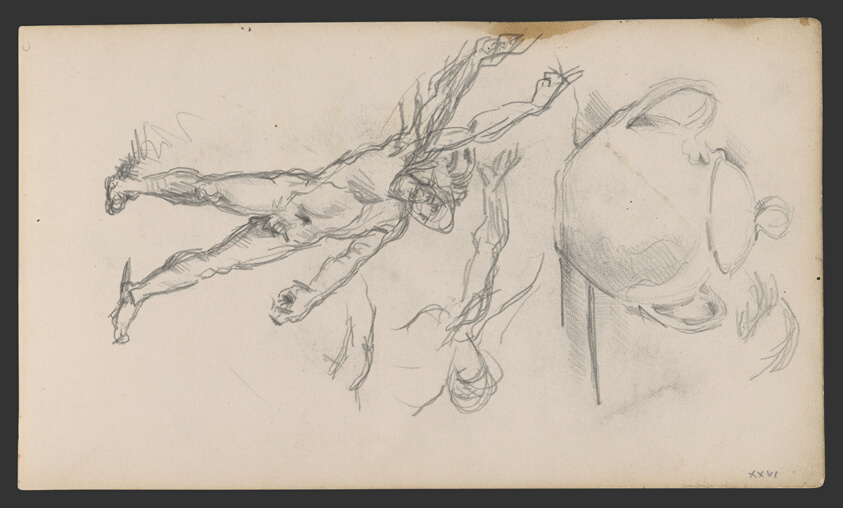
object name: Drawing and Watercolor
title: Sketchbook No. 2 (L'Estaque)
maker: Paul Cézanne; French, 1839-1906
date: 1875–86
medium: Graphite and pen and ink drawings on paper, bound into a book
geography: France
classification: sketchbook; graphite; prints and drawing; paper